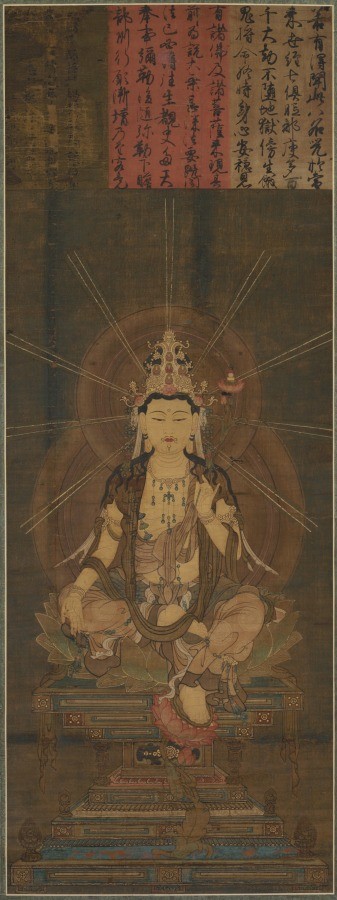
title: Miroku (Maitreya)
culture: Japan, Nanbokuchō period (1336–92)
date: 1300s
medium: Hanging scroll, ink, color, gold, and cut gold on silk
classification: Painting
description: In this image the figure of Miroku, Maitreya in Sanskrit, is richly adorned with gauzy fabrics, opulent jewels, and an intricate gold crown containing five seated Buddhas. Buddhist teachings say that Miroku will descend to Earth as a Buddha to restore Buddhist doctrine at the end of a long period of decline. Here he is represented as a bodhisattva, a being who has attained enlightenment but has chosen to postpone becoming a Buddha to help others reach enlightenment. Above the painting, three inscriptions present portions of a sacred text related to Miroku. A close look at the bodhisattva’s right side where fragile pigments have fallen away reveals writing on the back of the silk on which the image is painted— something its mounters never expected to be seen.